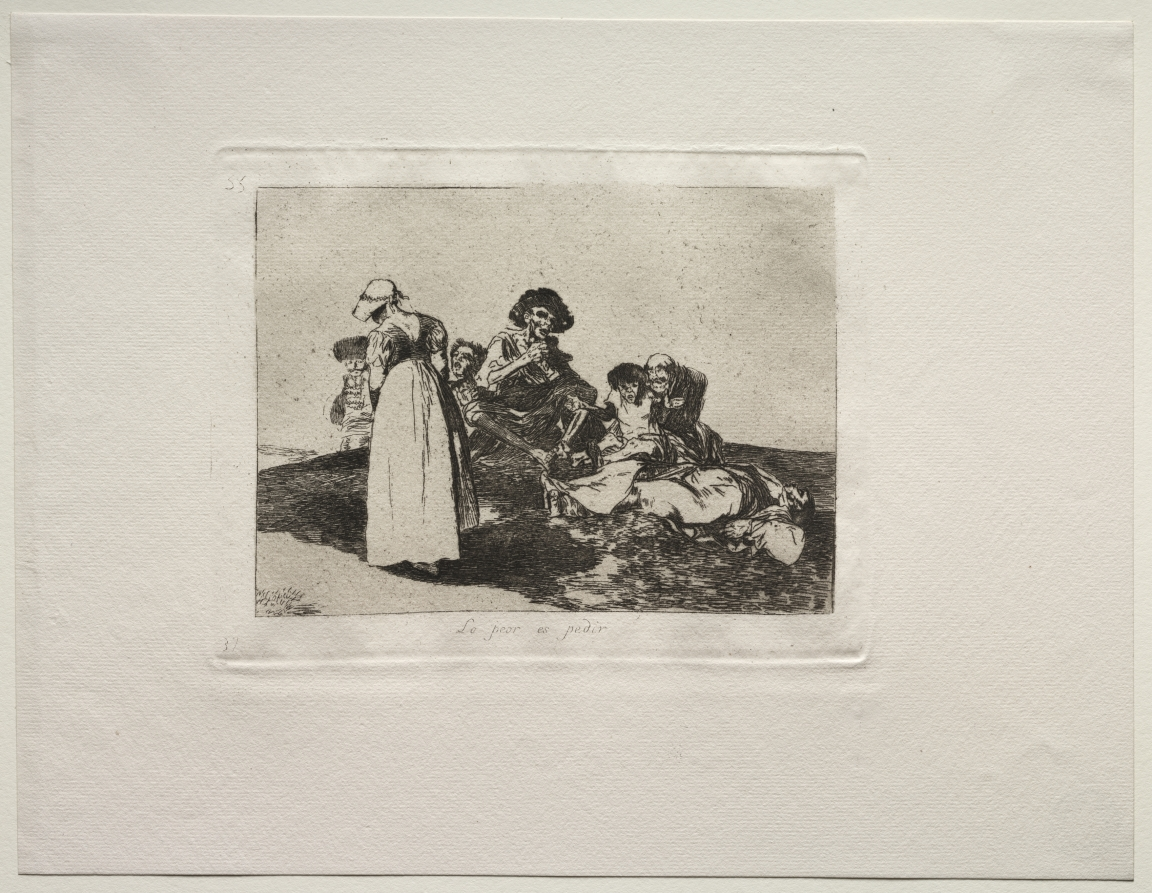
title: The Horrors of War: The Worst is to Beg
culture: Spain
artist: Francisco de Goya (Spanish, 1746–1828)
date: c. 1810–20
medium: etching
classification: Print